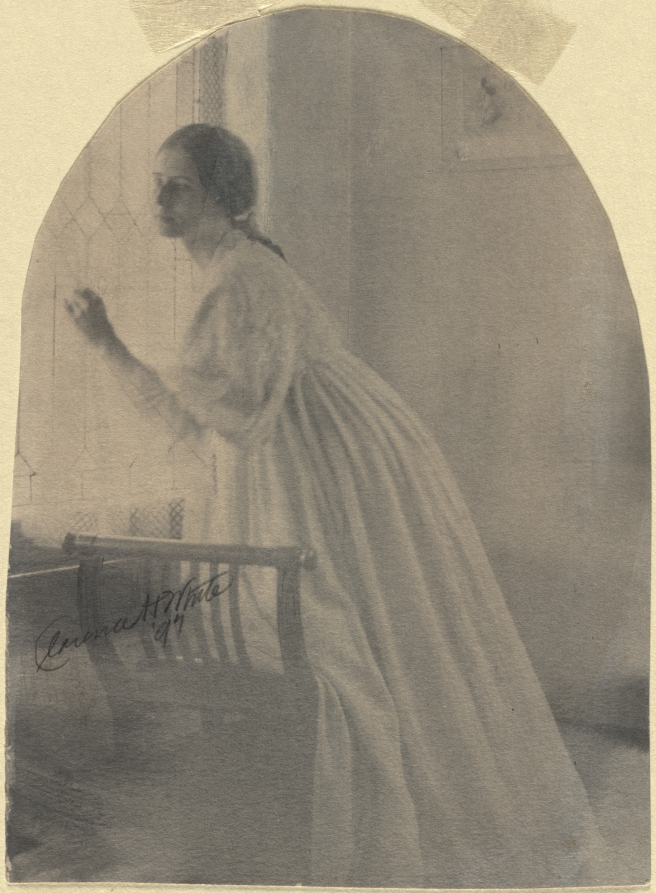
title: By the Window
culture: America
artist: Clarence H. White (American, 1871–1925)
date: 1896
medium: platinum print with crayon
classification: Photograph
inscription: Written in pencil on recto of photo: "Clarence H. White [signed] '97"; in pencil on verso: "Portrait of Julia McCune by / Clarence H. White about / 1897"; "28 [circled]"